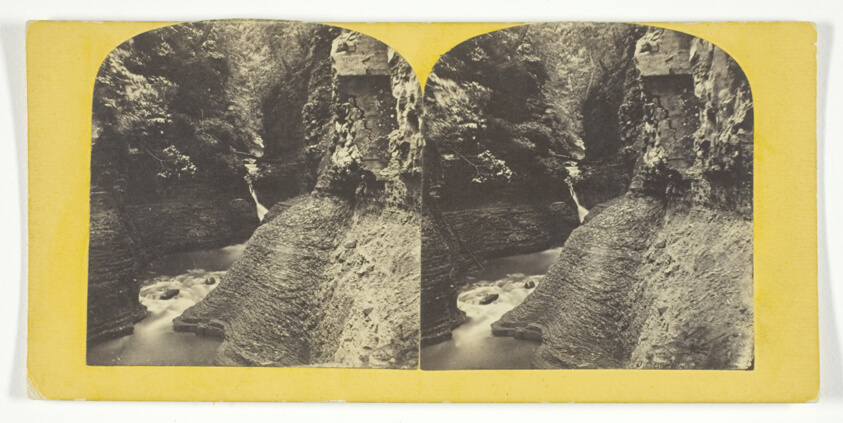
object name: Photograph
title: Freer Glen at Watkins View of Upper Glen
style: 19th century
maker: J. C. Burritt; American, active 1860s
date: 1860/65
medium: Albumen print, stereo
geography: United States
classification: photography; photograph; albumen silver print; stereograph (albumen)